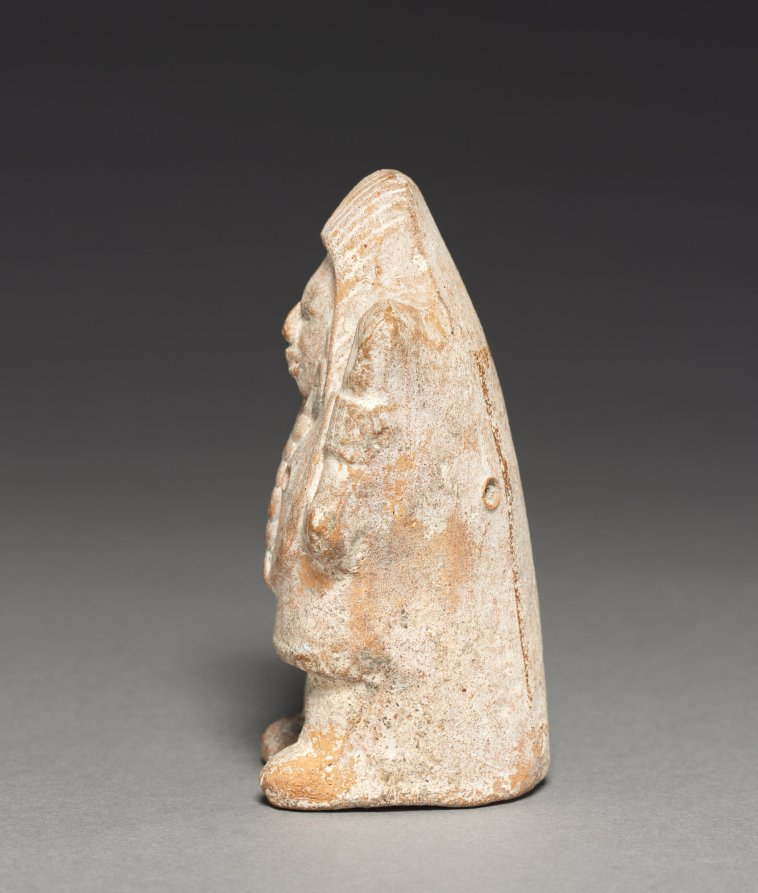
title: Female Figurine Rattle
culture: Mexico, Campeche, Jaina Island, Maya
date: 600–900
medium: Ceramic, pigment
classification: Sculpture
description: This hollow, mold-made figurine contains pellets that transform it into a rattle used as a musical instrument, perhaps during household rituals.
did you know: This hollow, mold-made figurine contains pellets that transform it into a rattle.